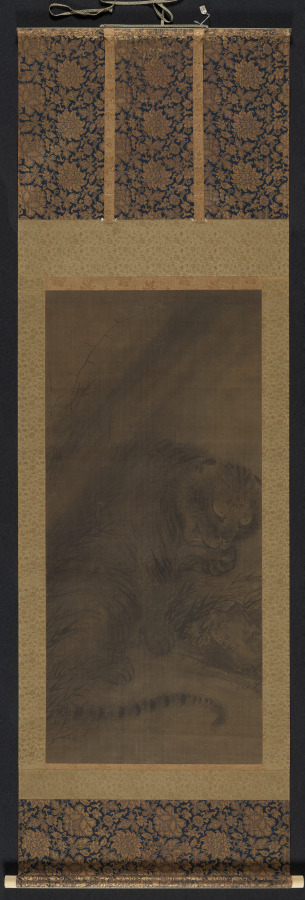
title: Tiger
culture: China, Southern Song dynasty (1127-1279)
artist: Fachang Muqi (Chinese, 1220–1280)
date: c. 1250–79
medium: Hanging scroll; ink and slight color on silk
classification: Painting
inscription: 道有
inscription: 雜華室印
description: The dragon and tiger are tied to the philosophical concept of yin and yang, which describes opposite but complementary forces. The dragon occupies a tiered background of waves and mist. Its luminous head emerges from the darker passages, and its narrow twisting body is serpent-like. By contrast, the close-up view of the tiger emphasizes its bulk. The tiger bends its head to lick its paw while its tail curls in the foreground. In their original Chan Buddhist context, this pair of scrolls likely flanked a central image, like the Bodhisattva Guanyin. The silk has darkened over the centuries, and the slight reddish shading in the tiger’s tongue and nose has faded.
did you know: Fachang Muqi's ink paintings, like this pair, were highly appreciated and collected in Japan.